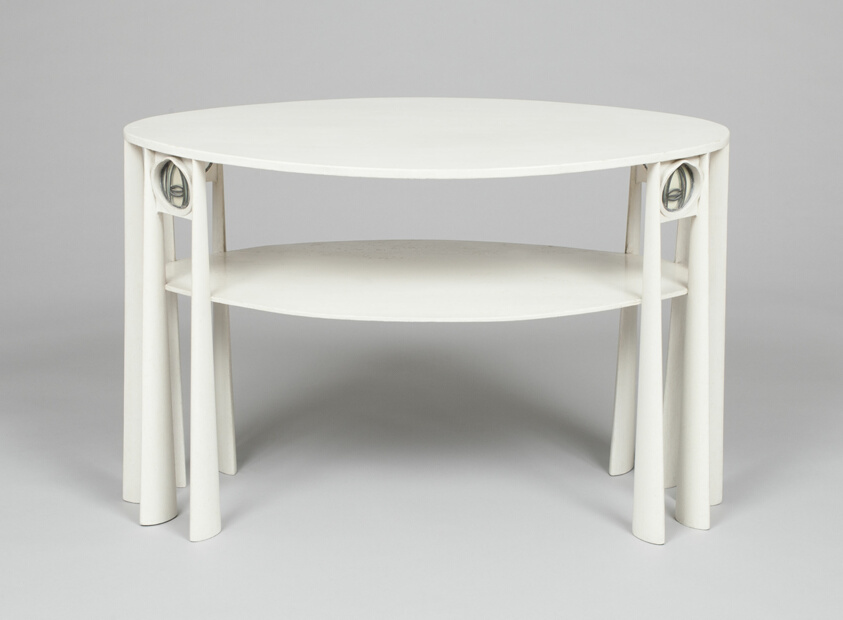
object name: Furniture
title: Table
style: Art Nouveau, modern movement, design reform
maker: Designed by Charles Rennie Mackintosh; Scottish, 1868-1928; Glasgow, Scotland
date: 1902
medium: Painted and white wood and clear and opaque leaded-glass insets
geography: Scotland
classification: table; furniture; european decorative arts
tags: furniture